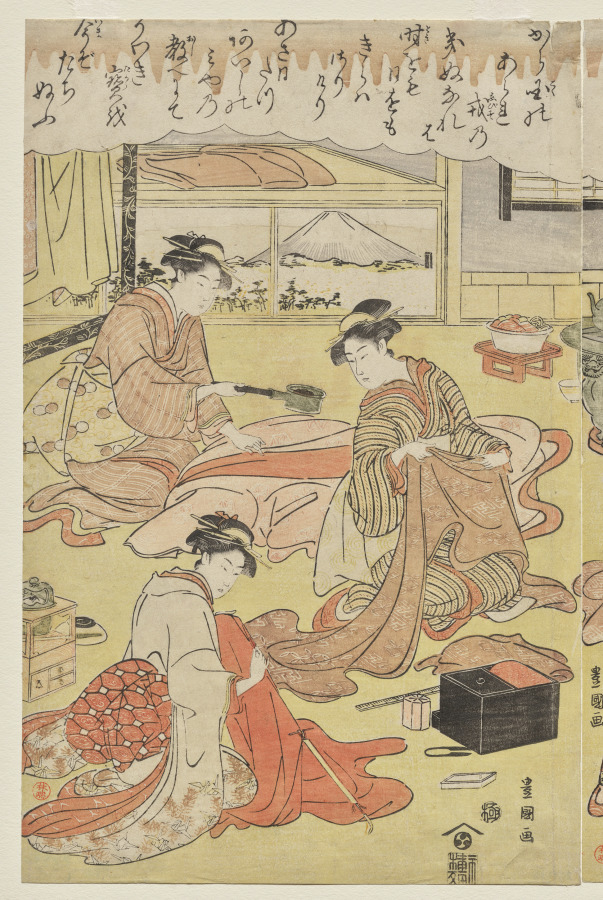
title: Women Making Clothing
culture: Japan, Edo period (1615–1868)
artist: Utagawa Toyokuni (Japanese, 1769–1825)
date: early 1790s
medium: color woodblock print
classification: Print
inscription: Signature: Toyokuni ga Publisher: Nishimuraya Yohachi (Eiju han, emblem) Censorship Seal: kiwame